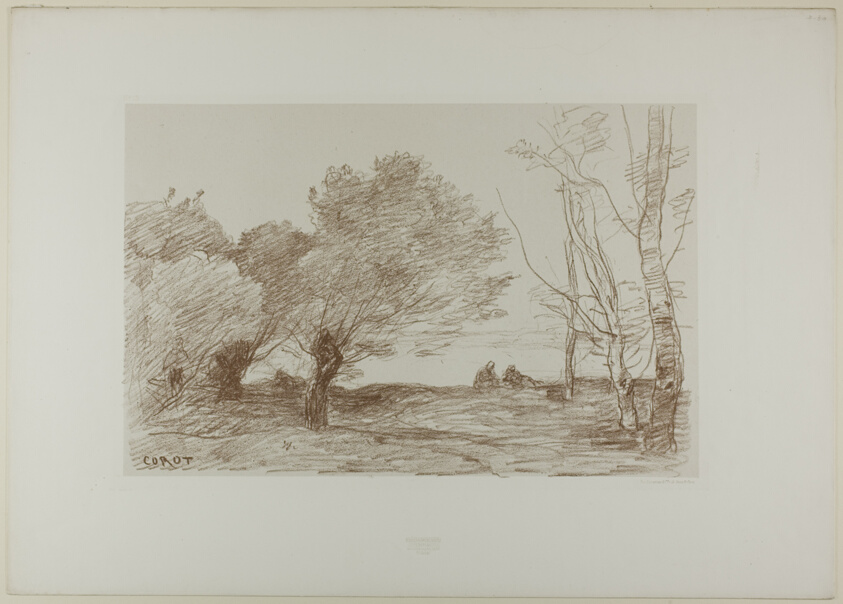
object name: Print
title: Willows and White Poplars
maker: Jean-Baptiste-Camille Corot (French, 1796-1875); printed by Lemercier et Compagnie (French, 1825-1891); published by Dessins Originaux, Edites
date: 1871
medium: Transfer lithograph printed in brown on light gray China paper laid down on white wove paper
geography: France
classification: lithograph; print; prints and drawing